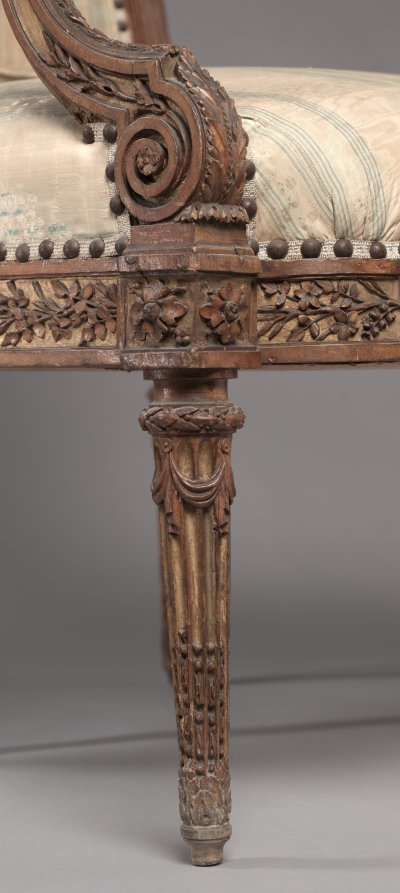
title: Armchair (Fauteuil) (1 of 2)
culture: France, 18th century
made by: Nicolas-Denis Delaisement (French)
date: c. 1785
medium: boxwood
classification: Furniture and woodwork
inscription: signed on back of frame of seat underneath: Delaisement with inverted "s."